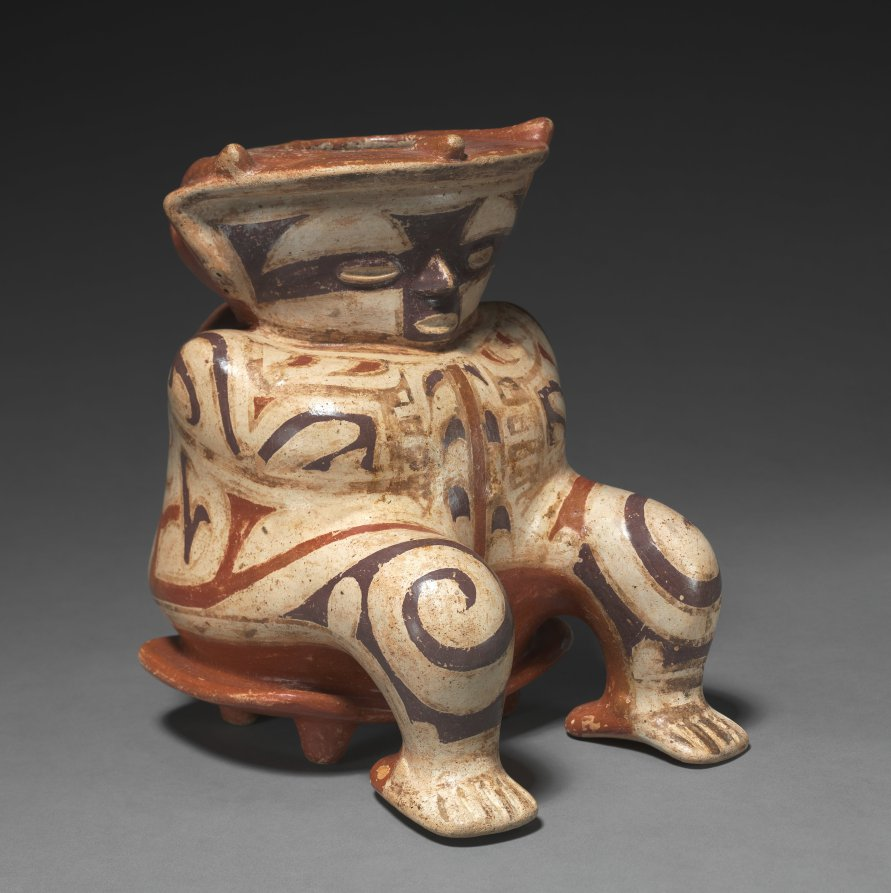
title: Hunchback Seated on a Stool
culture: Central Panama, Conte Style, c. 600-800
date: c. 600–800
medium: earthenware with colored slips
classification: Ceramic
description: The meanings of hunchbacks is not well-studied in Panamanian art. But to the north, in Mexico and Guatemala, such physical anomalies marked individuals of great spiritual power. A few of this figure’s features suggest that hunchbacks held similar status in Panama: The figure sits upon a four-legged stool, a symbol of authority, and the mythic creatures painted on each side may connect the figure to the supernatural realm.